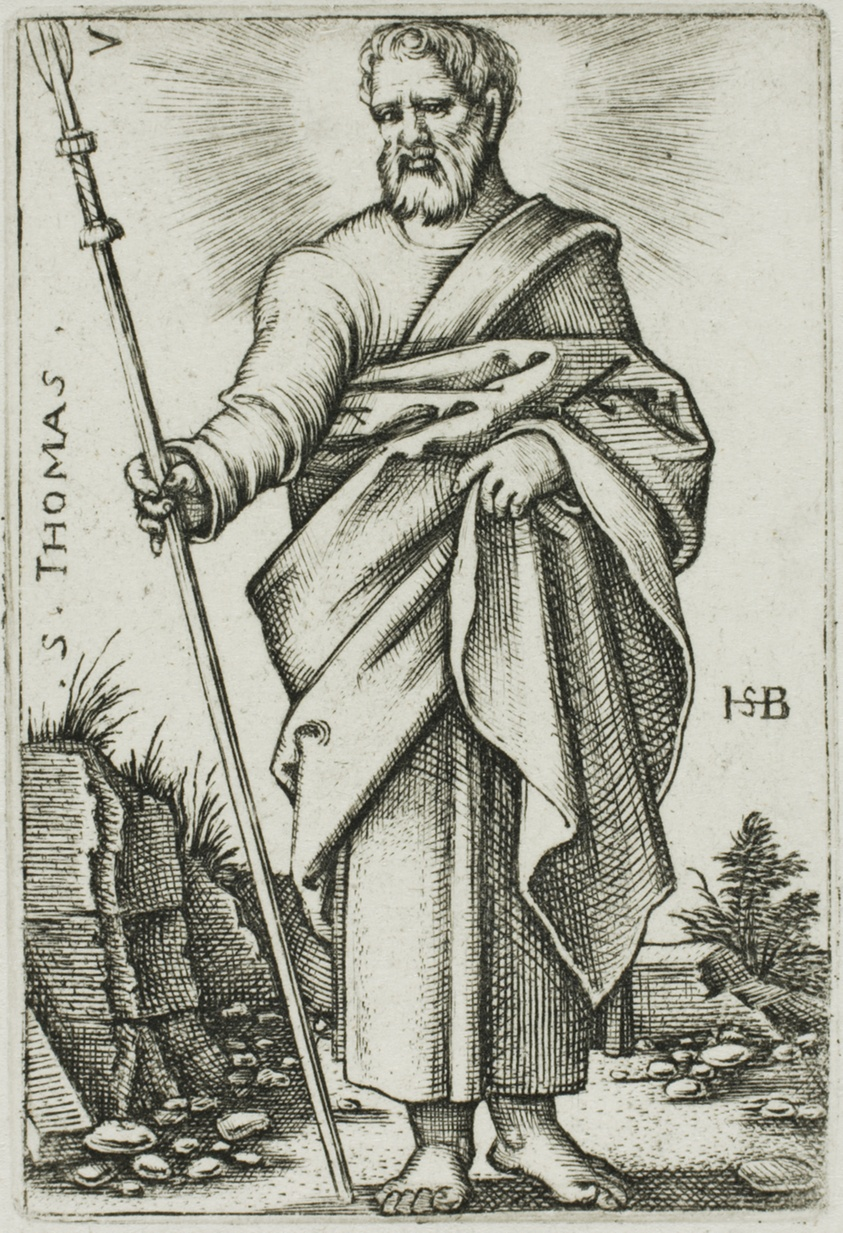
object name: Print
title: St. Thomas, plate 7 from The Twelve Apostles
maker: Sebald Beham; German, 1500-1550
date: 1545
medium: Engraving in black on white wove paper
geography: Germany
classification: engraving; print; prints and drawing